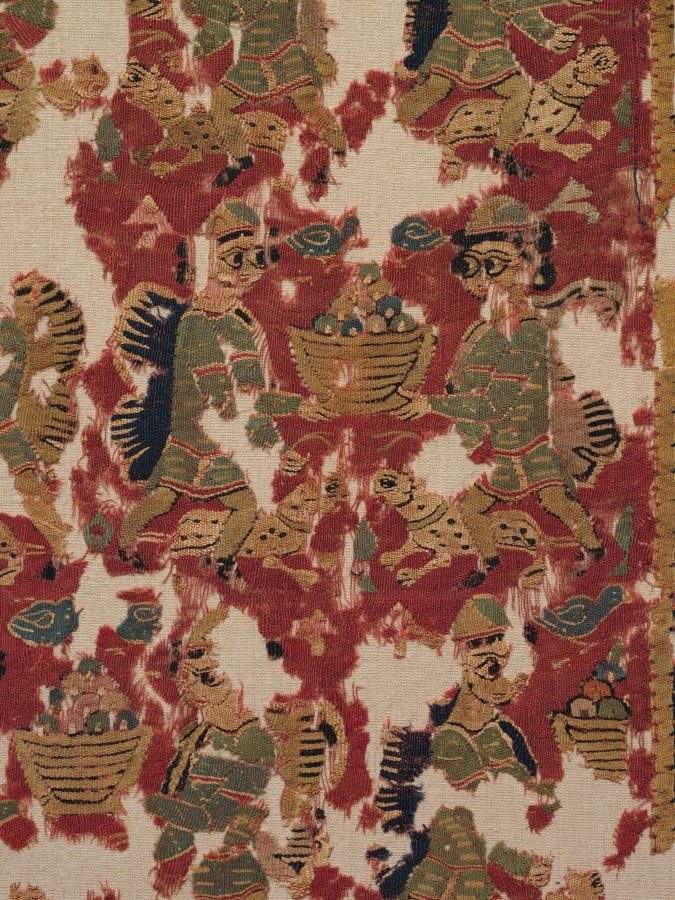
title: Fragment of a Large Hanging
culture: Egypt, Antinoë, Byzantine period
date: 500s CE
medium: tapestry weave (with plain tabby borders): wool and linen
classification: Textile